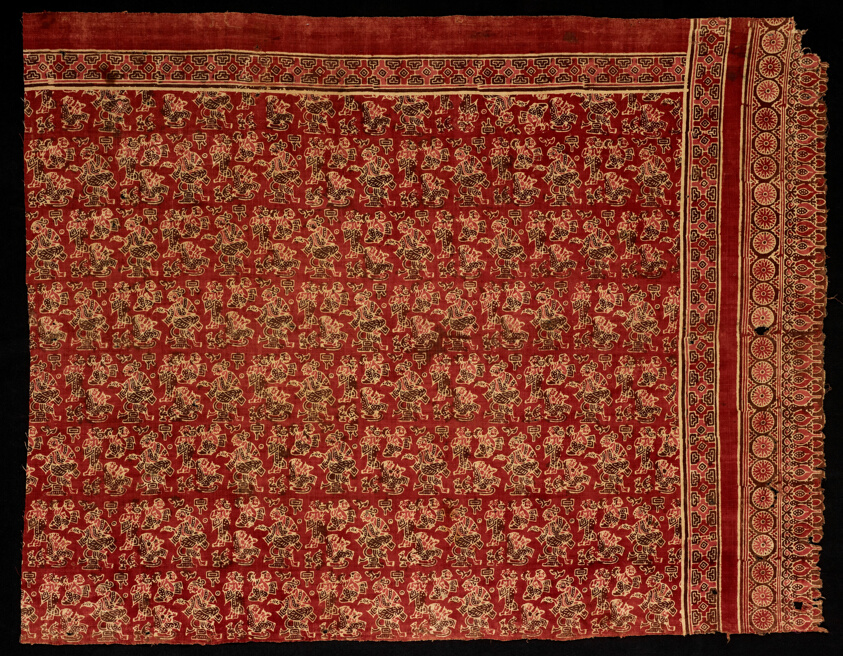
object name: Textile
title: Fragment of Mawa' or Ma'a (Sacred Heirloom Textile)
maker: India, Gujarat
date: late 14th or 15th century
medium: Cotton, plain weave; block printed resist and mordeant dyed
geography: India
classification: textile; weaving - printed